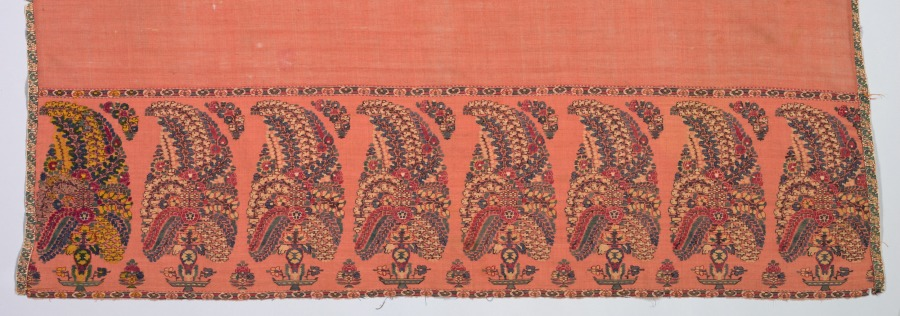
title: Apricot Long Shawl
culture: India, Kashmir, Afghan period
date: 1785–1800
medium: 2/2 twill tapestry weave, double interlocked; wool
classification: Textile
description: Artistic styles evolved with increasingly elaborate mosaic-like decoration during the 1800s to meet an insatiable European demand. Early shawls had plain fields with isolated plants in the end panels, which led to decorated side borders and vases of blossoming stems. Such flora was replaced by colorful, dense blossoms forming cone-shaped botehs, or paisleys, on trays. To this was added a gallery of small botehs and angular floral vines around a rich blue field with single botehs in the corners. Lightweight, supple, warm, and colorful, Kashmir shawls had no equal. Fine, soft goat-hair wool was woven in a 2/2 twill tapestry weave—the equivalent of painting with colored weft threads. Imitations woven in Paisley, Scotland, prompted the popular term paisley.